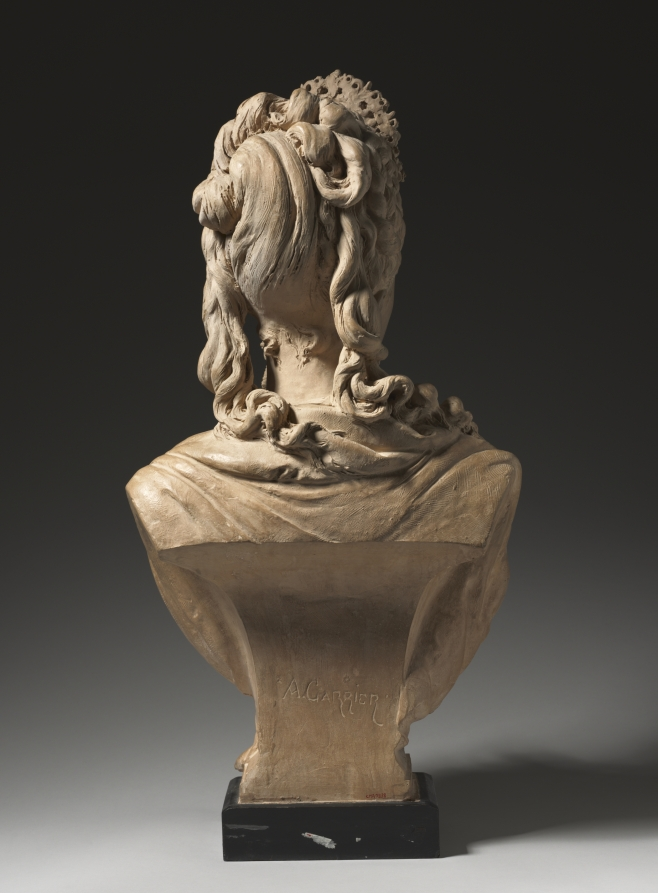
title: Portrait Bust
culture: France, 19th century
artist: Albert-Ernest Carrier-Belleuse (French, 1824–1887)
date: c. 1865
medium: terracotta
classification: Sculpture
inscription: incised in the clay on the back: "A. Carrier"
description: Among the artists who reacted against the static poses of neoclassical art, Carrier-Belleuse drew inspiration from the opulence and excess of Rococo portraiture of the 1700s. This bust resembles one of Napoleon III's mistresses, Marguerite Bellanger, whose features the artist is known to have borrowed for his female busts. Carrier-Belleuse received commissions from Napoleon III, ruler of France from 1852 to 1870, and contributed to the sculptural decorations of the Louvre and Opera Garnier in Paris.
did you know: The possible muse for this bust, Virginia Oldonia, was a countess know for her drama and costumes.